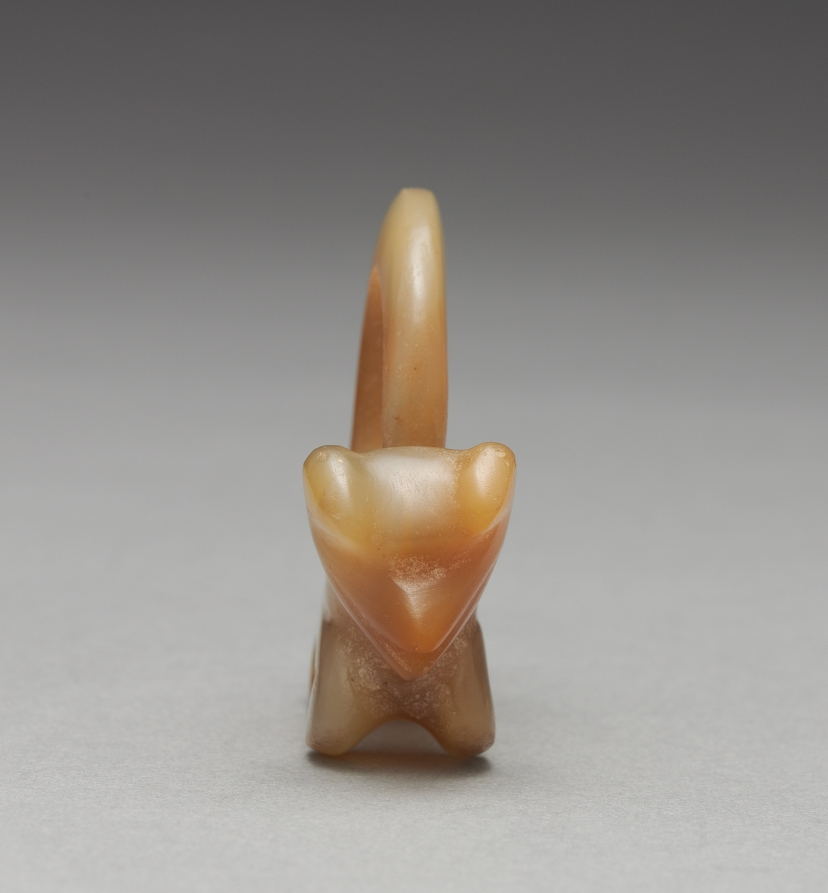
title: Curly-Tailed Animal Pendant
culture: Panama, Initial style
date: 100–800 CE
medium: agate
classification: Sculpture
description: A favored Initial-style subject is a charming animal whose curly tail-its most impressive feature-may derive from a monkey's. Its other traits vary considerably, causing it to be identified as everything from a dog to a duck. Initial-style gold ornaments represent Panama's oldest metalwork. Since metal technologies appeared suddenly and fully developed in Panama, it is likely that they were introduced from the outside, probably from Colombia to the south.